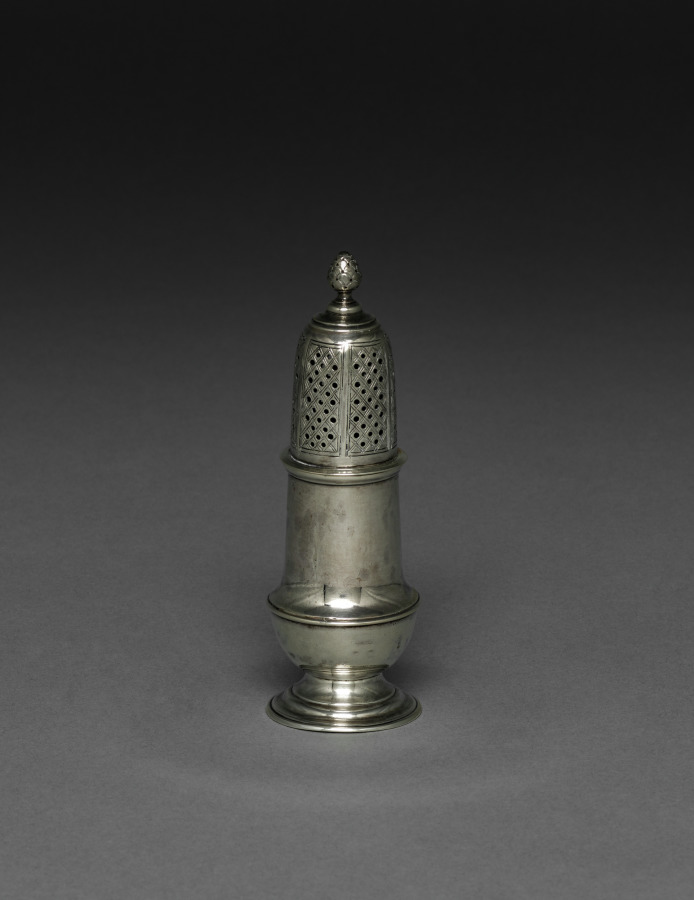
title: Caster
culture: America, Massachusetts, Salem, 18th century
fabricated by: John Andrew (American, 1747–1791)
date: c. 1770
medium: silver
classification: Silver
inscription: Engraved underside of base: "C * S"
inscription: Stamped on side of vessel: "Andrew"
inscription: Scratched underside of base: "3-10"